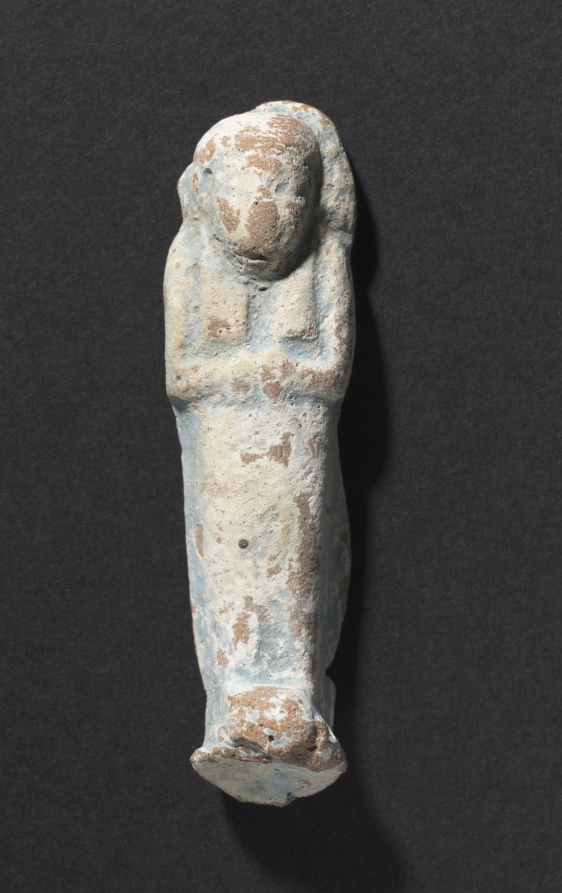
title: Shawabty of Ditamenpaankh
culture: Egypt, Late period (715–332 BCE), Dynasty 25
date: 715–656 BCE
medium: terracotta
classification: Funerary Equipment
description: High demand for shawabtys in the Late Period, a time when as many as 400 or more shawabtys were placed in the tomb with the deceased, gave rise to a specialized container for storing them: the shawabty box. This example is inscribed for the lady of the house, Ditamenpaankh, and was probably one of a pair originally made for her. The single-masted boat on the box's lid is perhaps an allusion to the pilgrimage of the deceased to the holy city of Abydos, the cult city of Osiris, king of the dead. The shawabtys inside are crude, mass-produced examples cast in an open mold. Made of terracotta, their blue paint imitates more costly shawabtys made of faience. As for the shawabty spell, it has been removed from its traditional location on the shawabty's front and relocated onto the sides of box, where it needed only to be written once, thus expediting production.